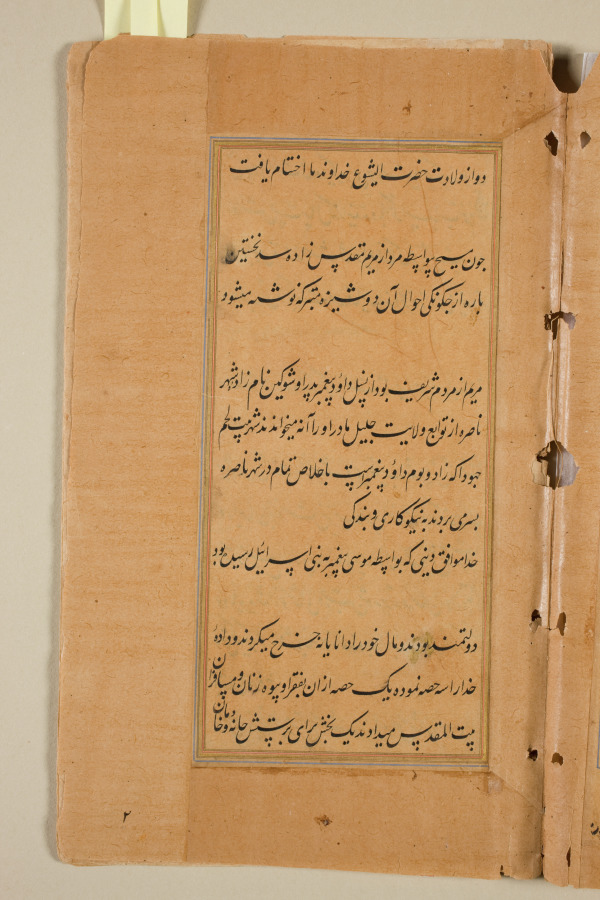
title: Text, Folio 6 (recto), from a Mirror of Holiness (Mir’at al-quds) of Father Jerome Xavier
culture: Mughal India, Allahabad, made for Prince Salim (1569–1627)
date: 1602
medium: Ink and gold on paper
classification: Manuscript